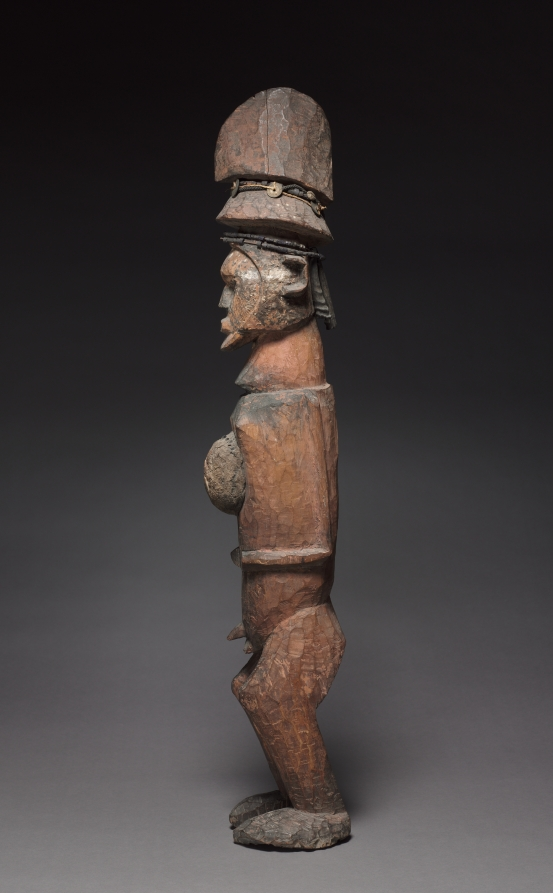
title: Male Figure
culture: Africa, Central Africa, Republic of the Congo (most likely) or Democratic Republic of the Congo, Teke-style maker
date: late 1800s-early 1900s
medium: Wood, resin, iron, copper, plant fiber, cloth, glass beads, coins, antelope horns, and cowrie shells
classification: Sculpture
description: This exceptionally large Teke figure is well preserved and holds a medicine package partly buried in an abdominal cavity. Its size suggests that it stood at the service of a larger group of people and that its powers extended beyond the limits of a village. Its scarification marks and beard identify it as representing a chief or another dignitary.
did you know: The coins on the figure’s hat were those used in the Belgian Congo.